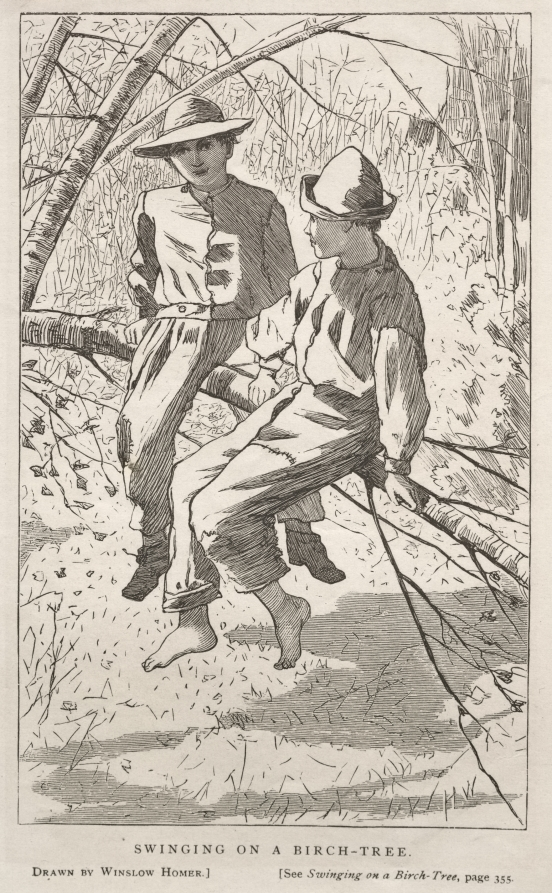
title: Swinging in a Birch Tree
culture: America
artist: Winslow Homer (American, 1836–1910)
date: 1867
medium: wood engraving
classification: Print